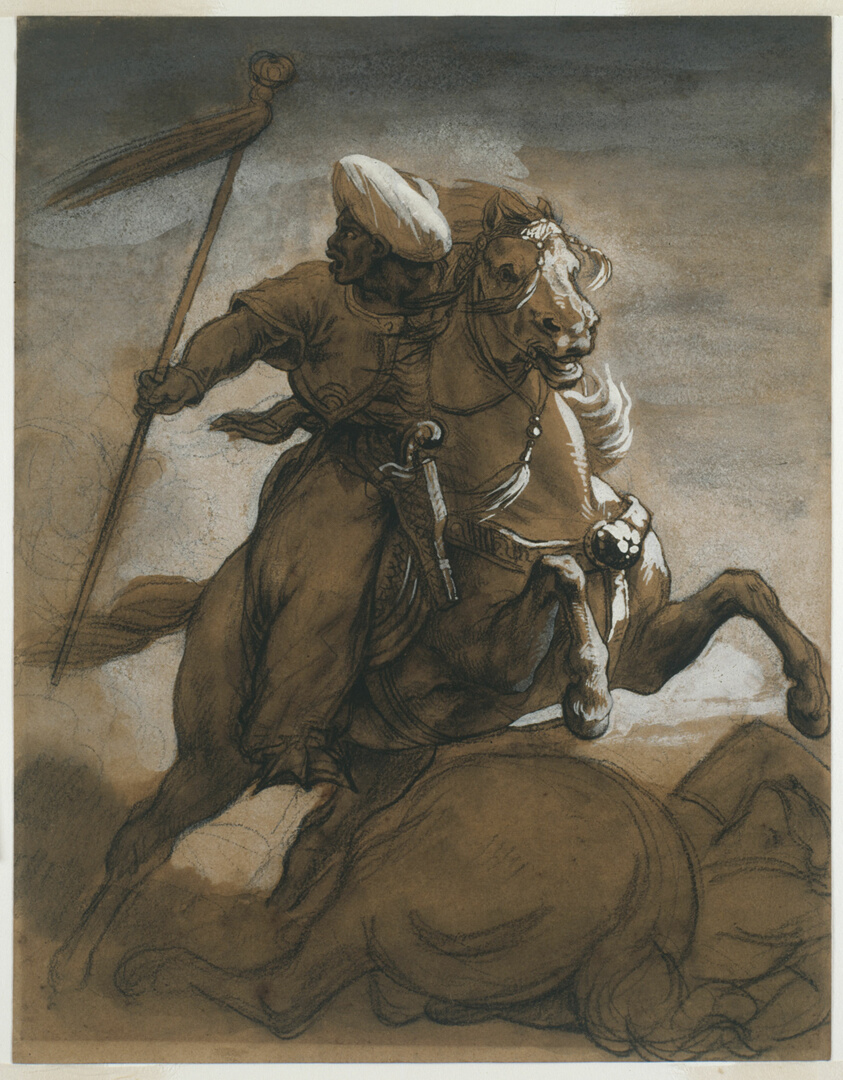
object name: Drawing and Watercolor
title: Turkish Cavalier in Combat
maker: Jean Louis André Théodore Géricault (French, 1791-1824)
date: c. 1818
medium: Brush and brown wash, heightened with white gouache over black chalk, with blue wash on brown laid paper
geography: France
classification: wash; drawings (visual works); prints and drawing